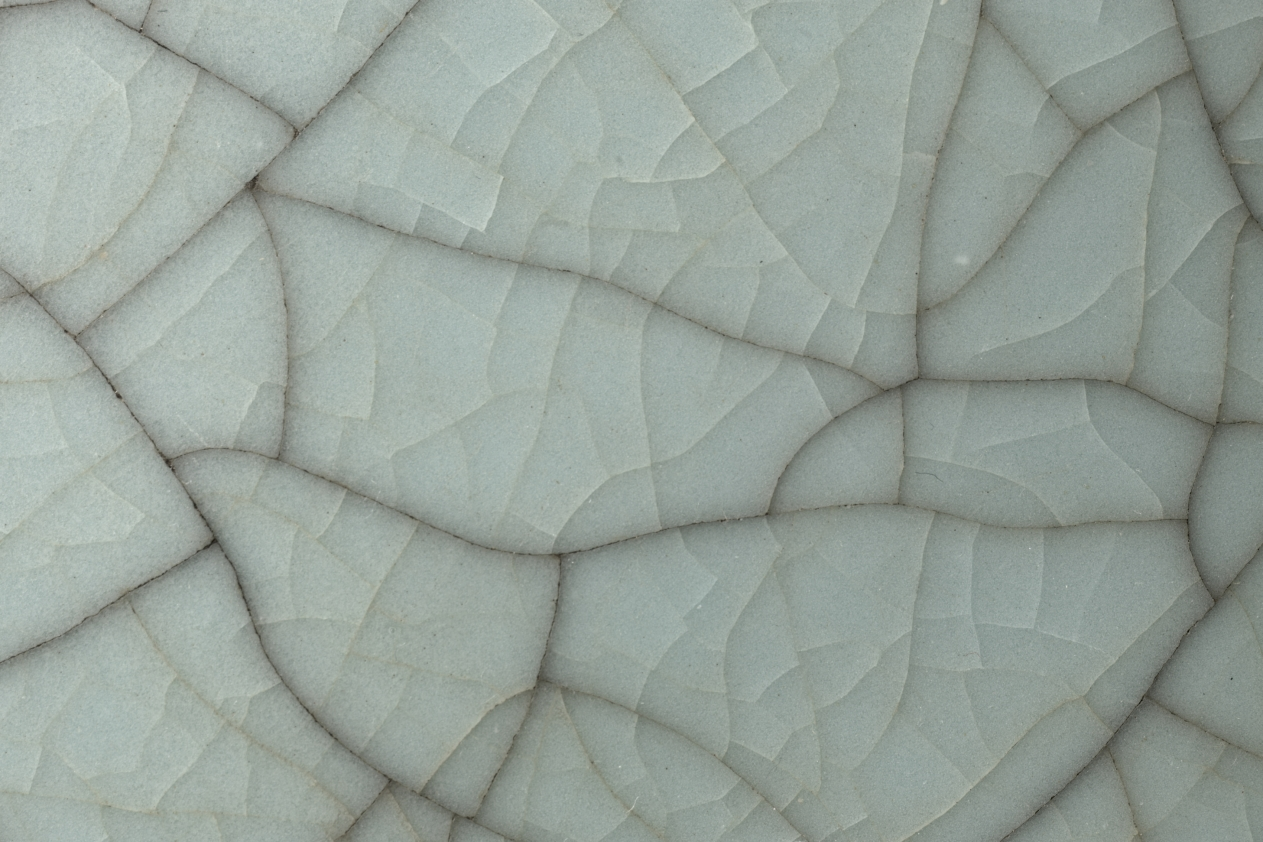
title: Basin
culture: China, Zhejiang province, Hangzhou, Southern Song dynasty (1127-1279)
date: 1127–1279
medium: porcelaneous stoneware, Guan ware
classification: Ceramic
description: Guan ware was the official ware fired at the Southern Song imperial kilns in Hangzhou. Multiple glazing is characteristic of this ware. The total thickness of the glaze can be greater than the clay body that supports it. Here, the thick gray-green glaze is webbed with a wide network of dark brown crackles as well as finer webs of light golden-brown and colorless crackles. The crackle pattern was developed after firing, due to the different rates of expansion and contraction of the body and the glaze. It was consciously exploited to achieve an aesthetic effect and was stained at different stages during the cooling process.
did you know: The base shows that the basin was fired on 17 small spurs arranged in two concentric circles.